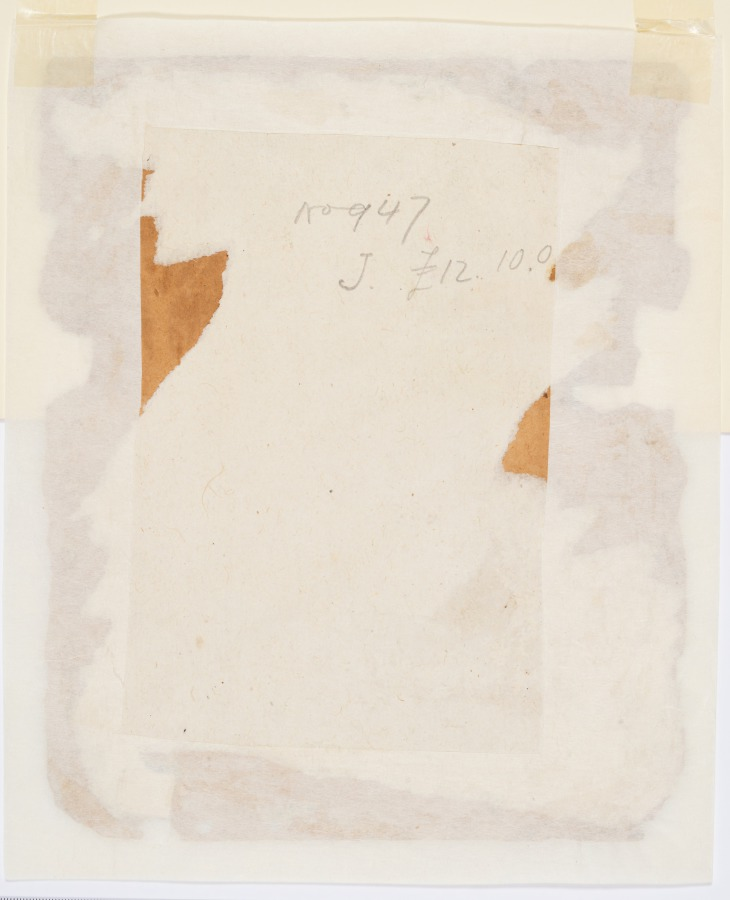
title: Woman Feeding Deer: Todi Ragini, from a Ragamala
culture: Northwestern India, Rajasthan, Rajput Kingdom of Amber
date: c. 1610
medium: gum tempera and gold on paper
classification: Painting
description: The lone woman wears an orange skirt under a sheer brown sari with gold patterns. She offers some grass to one of four deer that approach her with enthusiasm. She holds a blue and gold vina and faces to the viewer’s left. A poetic verse in Sanskrit describing Ragini Todi is inscribed within the upper yellow border.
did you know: Melodies played in the musical mode or key called Todi are performed between 9 AM and 12 PM.